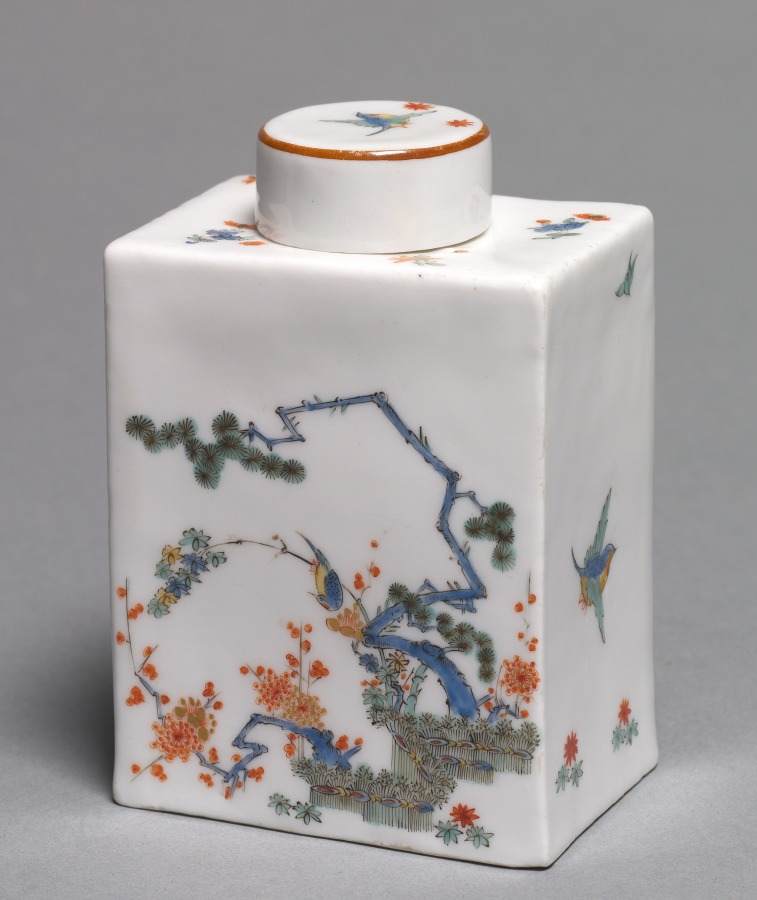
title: Tea Caddy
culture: Germany, Meissen, 18th century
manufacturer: Meissen Porcelain Factory (German, est. c. 1710)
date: c. 1735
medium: porcelain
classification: Ceramic